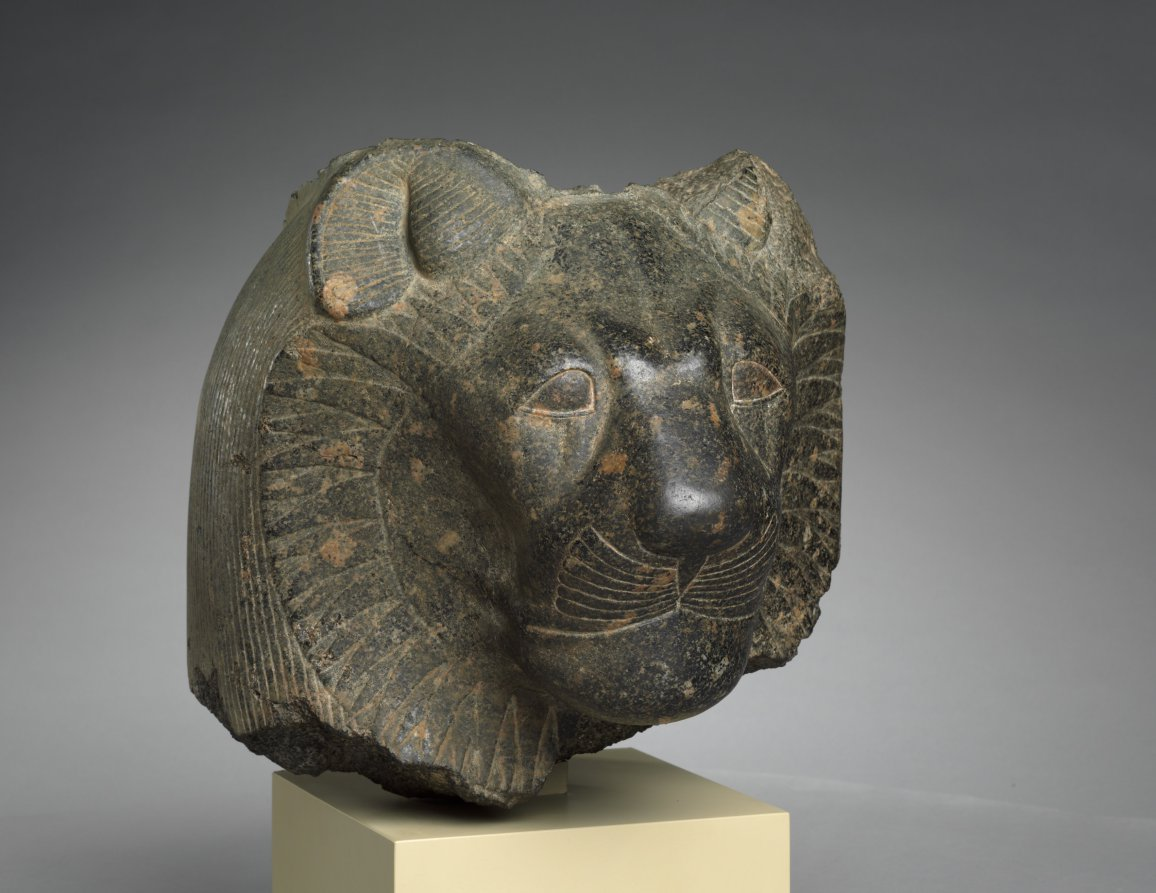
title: Head of Sekhmet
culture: Egypt, Thebes(?), New Kingdom (1540–1069 BCE), Dynasty 18, reign of Amenhotep III (1390–1352 BCE)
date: c. 1391–1353 BCE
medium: granodiorite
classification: Sculpture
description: This lioness head once belonged to a grand statue of the goddess Sekhmet, "the powerful one," probably seated and wearing a tight dress. Possibly appealing to her healing aspect, Pharaoh Amenhotep III, often described as “beloved of Sekhmet,” commissioned and dedicated hundreds of large granodiorite Sekhmet sculptures in his Theban mortuary temple. Thus, this head likely comes from Thebes, perhaps later moved across the Nile—like many such sculptures—to the temple of Mut, a related deity, at Karnak. Behind her stylized ruff, Sekhmet wears a wig, once crowned with a sun disk and uraeus, the stylized cobra symbolizing royal or divine power.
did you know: Amenhotep III may have dedicated 730 statues of Sekhmet, two for each day of the year.